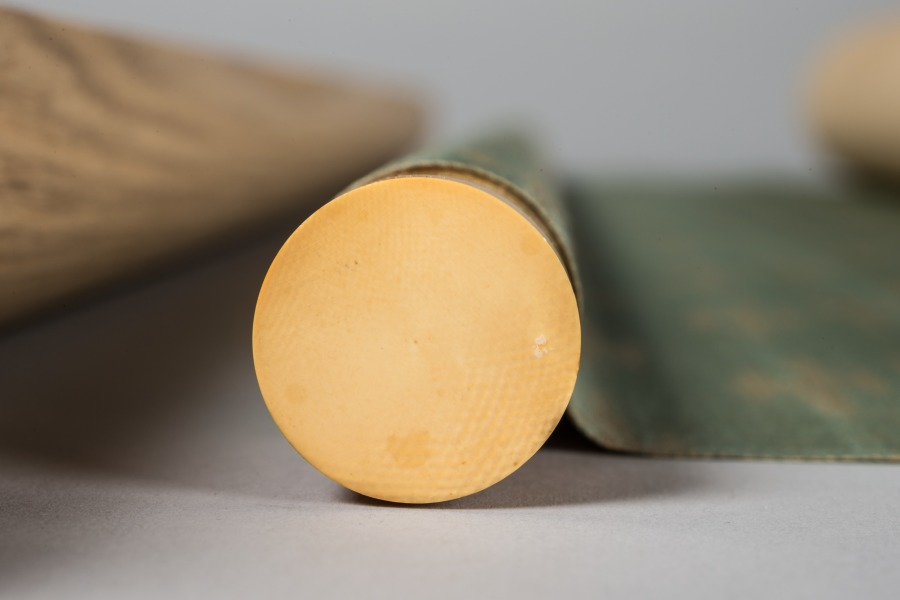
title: Shennong (Shinnō)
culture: Japan, Muromachi period (1392–1573)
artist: Shōryō (Japanese)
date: late 1400s–early 1500s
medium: hanging scroll; ink on paper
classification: Painting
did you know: Shennong legendarily taught people how to farm and also how to use plants as medicine.